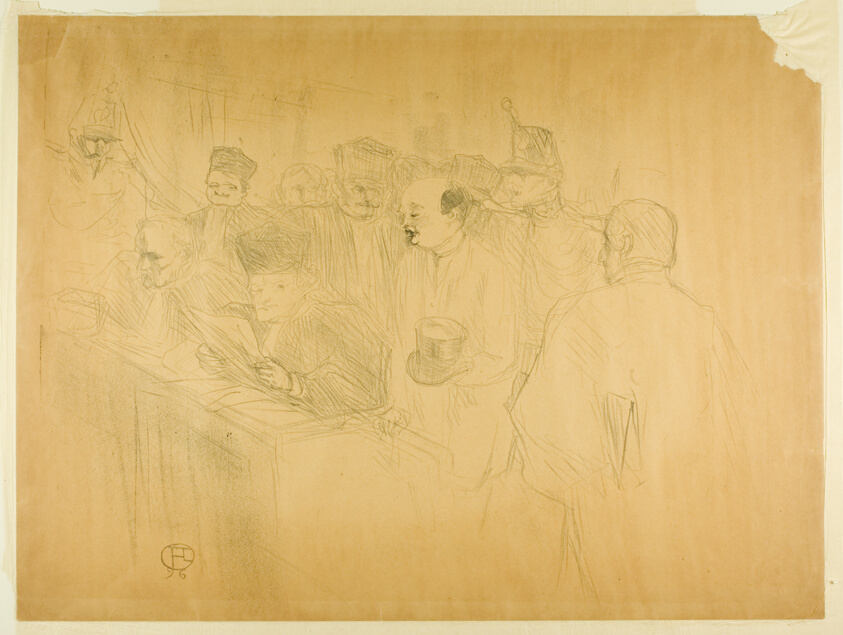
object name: Print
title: The Arton Trial (third plate)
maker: Henri de Toulouse-Lautrec (French, 1864-1901)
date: 1896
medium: Lithograph on tan wove paper, laid down on cream Japan tissue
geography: France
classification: lithograph; print; prints and drawing